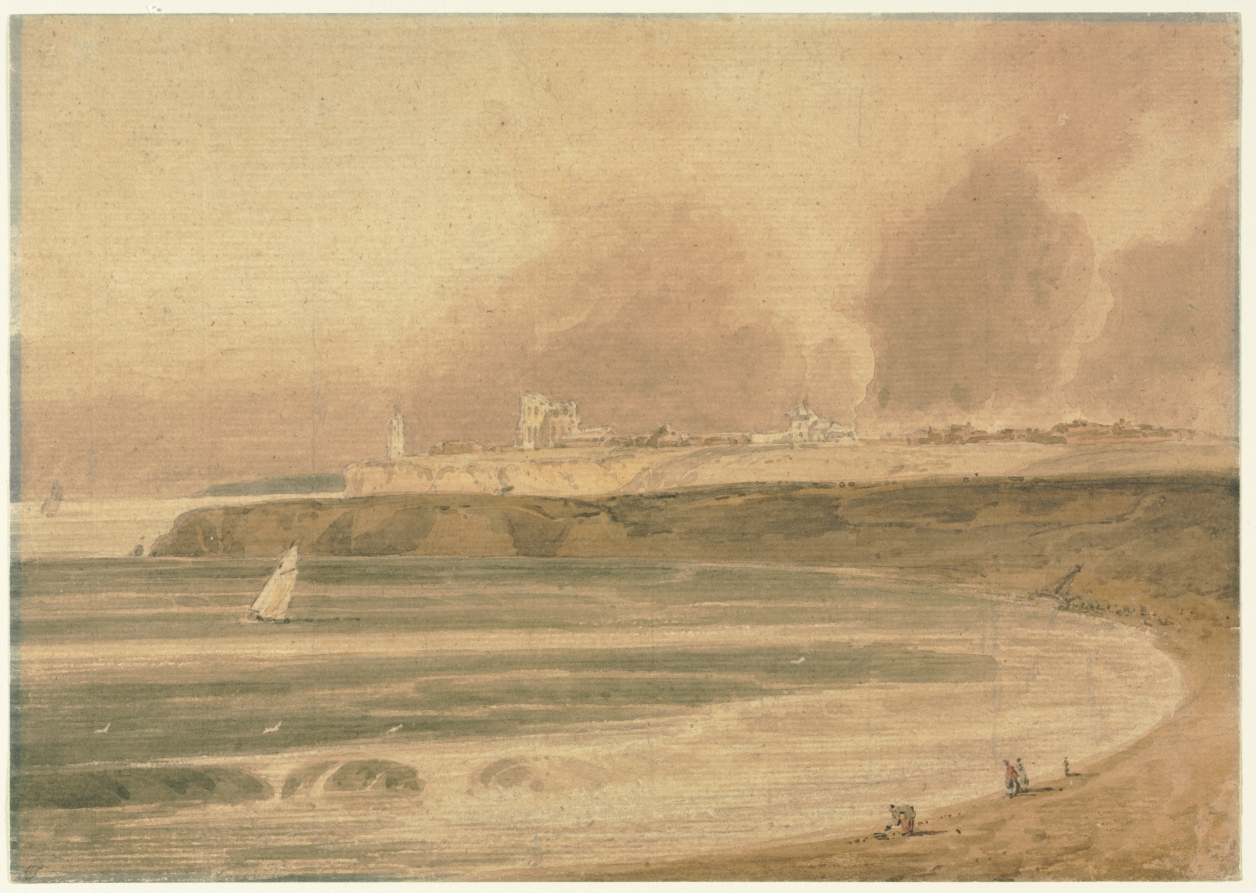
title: Tynemouth, Northumberland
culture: England, 18th century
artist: Thomas Girtin (British, 1775–1802)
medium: watercolor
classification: Drawing